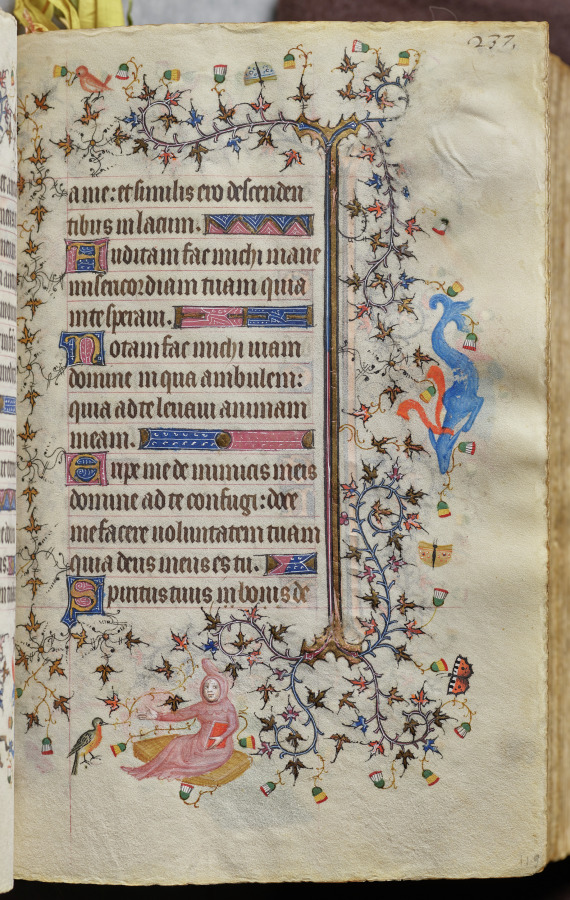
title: Hours of Charles the Noble, King of Navarre (1361-1425): fol. 119r, Text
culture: France, Paris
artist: Master of the Brussels Initials and Associates (French)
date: c. 1405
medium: ink, tempera, and gold on vellum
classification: Bound Volume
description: This precious volume was obviously highly prized by its owner, the French-born King of Navarre, who had his coat of arms painted on no less than twenty folios. Rather than directly commissioning this manuscript from a specific workshop, it seems that Charles the Noble acquired his book of hours -- perhaps ready-made for the luxury market -- while on a trip to Paris in 1404-05. A collaborative effort, six painting styles are evidenced within the pages of this codex, those of two Italians, two Frenchmen, and two Netherlanders. The painter who was responsible for the planning and decoration of the book, and who produced seventeen of the large miniatures, was a Bolognese artist known as the Master of the Brussels Initials. His principal assistant, responsible for most of the borders, was a Florentine who signed his name "Zecho" da Firenze on folio 208 verso.